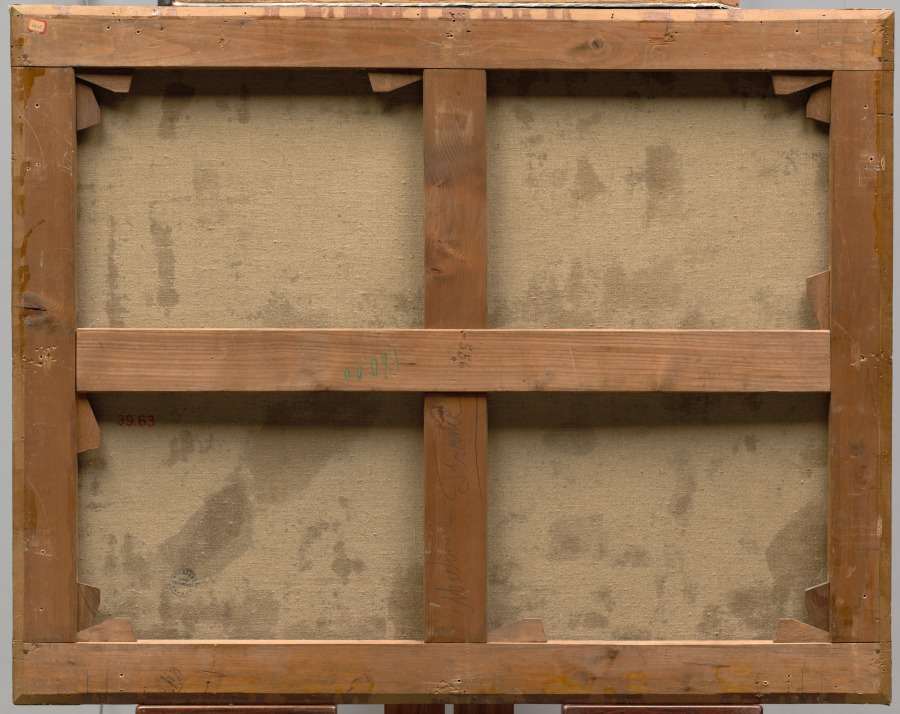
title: Study of a Reclining Nude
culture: France, 19th century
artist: Isidore Pils (French, 1813/15–1875)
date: c. 1841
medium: oil on fabric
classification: Painting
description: The languorous, sensuous pose of this woman is strongly reminiscent of Jean Auguste Dominique Ingres's popular paintings of odalisques, female slaves, and concubines in Turkish harems. Much of this canvas has been left thinly painted or entirely blank, suggesting that it was a figural study rather than a finished work of art. The French Academy in the 1800s viewed the depiction of the nude as the ultimate measure of an artist's skill. Because models changed poses frequently, students had to work quickly and without embellishment. Here the artist completed only those areas needed to emphasize the contours of the model's body.